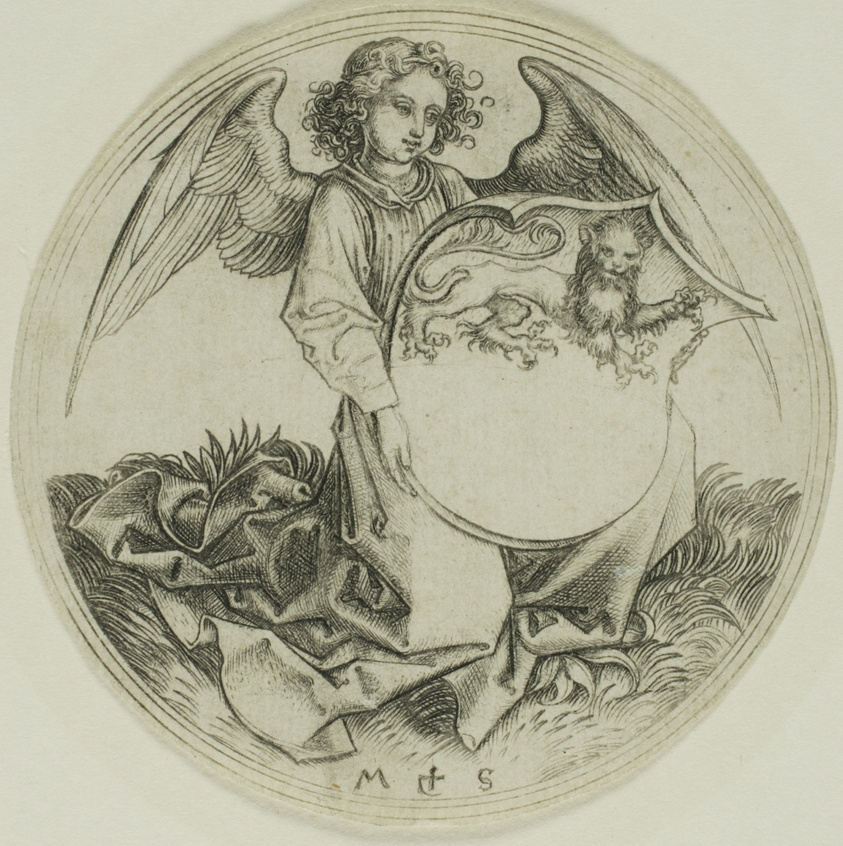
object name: Print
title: Shield with a Lion, Held by an Angel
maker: Martin Schongauer (German, c. 1430/50-1491)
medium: Engraving on paper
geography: Germany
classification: engraving; print; prints and drawing